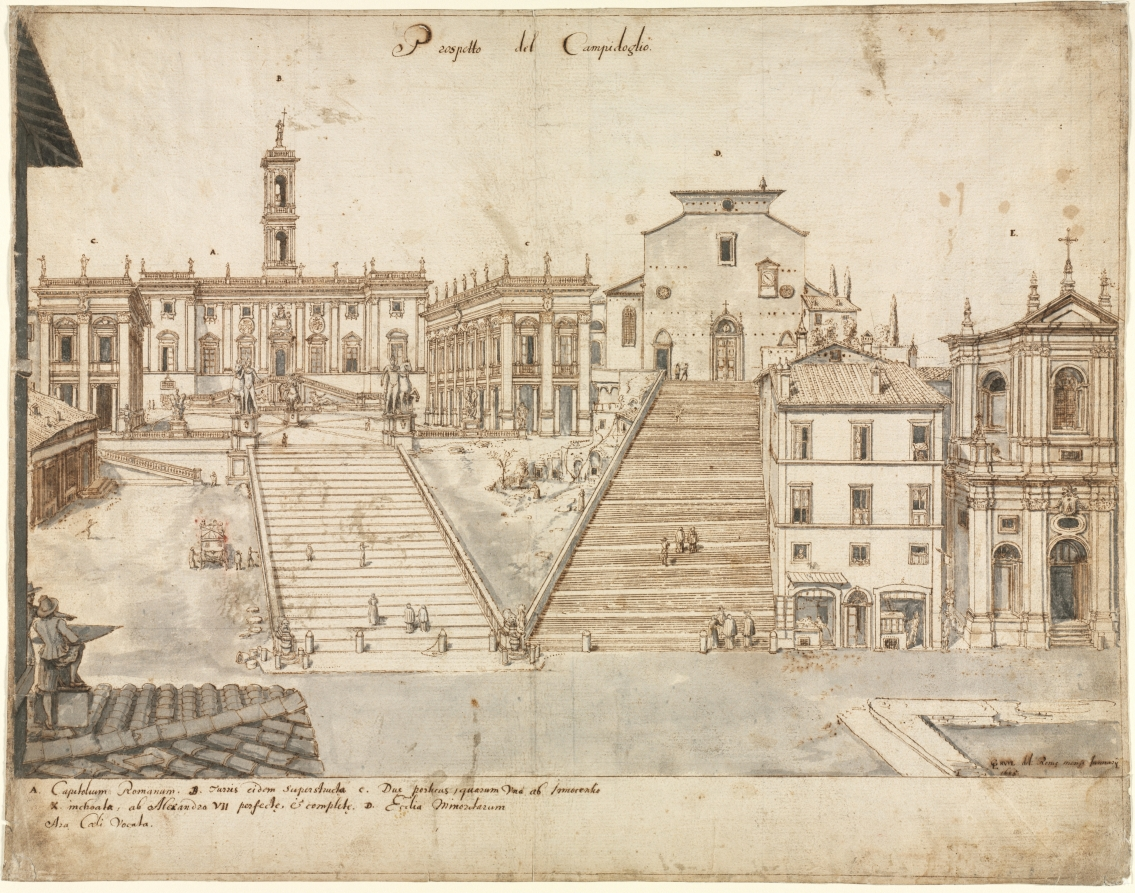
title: Eighteen Views of Rome: The Campidoglio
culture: Flanders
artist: Lievin Cruyl (Flemish, c. 1640-c. 1720)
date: 1665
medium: pen and brown ink and brush and gray wash over graphite; framing lines in brown ink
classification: Drawing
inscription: signed, lower right, in brown ink: [artist's monogram: LC] RVYL del: Romæ mense Januarij / 1665. ; by artist, upper center, in brown ink: Prospetto del Campidoglio ; by artist, throughout composition, in brown ink: [the letters A-E] ; by artist, lower left, in brown ink: A. Capitolium Romanum. B. Turris eidem superstructa. C. Due Porticus, quarum Una ab Innocentio / X. inchoatæ, ab Alexandro VII perfectæ et completæ. D. Ecclia Minoritarum / Ara Coeli Vocata. ; VERSO, upper left, in brown ink: S45.[partially masked] ; upper left in graphite: n. 545 ; ON STRIPS OF PAPER MOUNTED TO VERSO, lower center, in graphite: A20970 ; lower right, in graphite: E. 10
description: Flemish artist Lieven Cruyl made a number of drawings of emblematic vistas of Rome for the Roman publisher Giovanni Battista de Rossi, of which ten were published as etchings in 1666. The Campidoglio features architecture designed by Michelangelo. The Campidoglio was an important ritual space atop the Capitoline Hill overlooking the Roman Forum. Michelangelo reoriented the piazza to look away from the forum and toward Saint Peter’s Basilica, creating a link between the civic buildings on the piazza and the home of the Catholic Church. He had the piazza paved in a trapezoidal shape and placed the ancient Equestrian Statue of Marcus Aurelius on a newly designed plinth in the middle. With this design, he transformed the Campidoglio from a muddy hill to a central destination and ritual space for centuries to come.